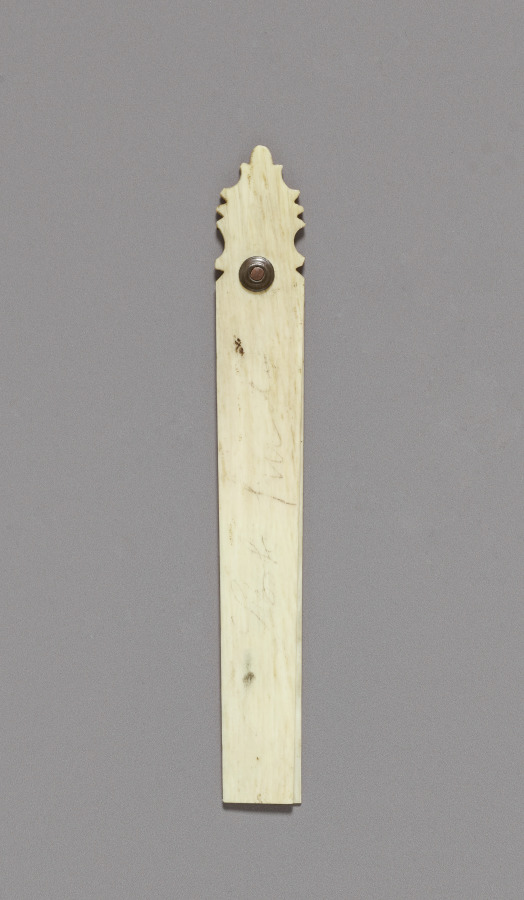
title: Note Board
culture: England, 18th century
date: c. 1770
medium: ivory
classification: Miscellaneous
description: Luxurious personal objects were an essential part of a privileged wardrobe during the 1700s and early 1800s, emphasizing their owner’s refinement and wealth. Especially popular were étuis, small ornamented cases containing miniature sewing, writing, or grooming implements that hung at a woman’s waist from an ornate clasp, known as a chatelaine. Despite its glittering surface, this small expensive set disguised a system based on the labor and suffering of enslaved or indentured people, whether in gold and stone mines or the shop where it was made.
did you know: Stored inside this case are grooming and writing instruments such as a clasp knife, scissors, an ivory tablet, a pencil, a threading needle used for lacing corsets, and an ear scoop.